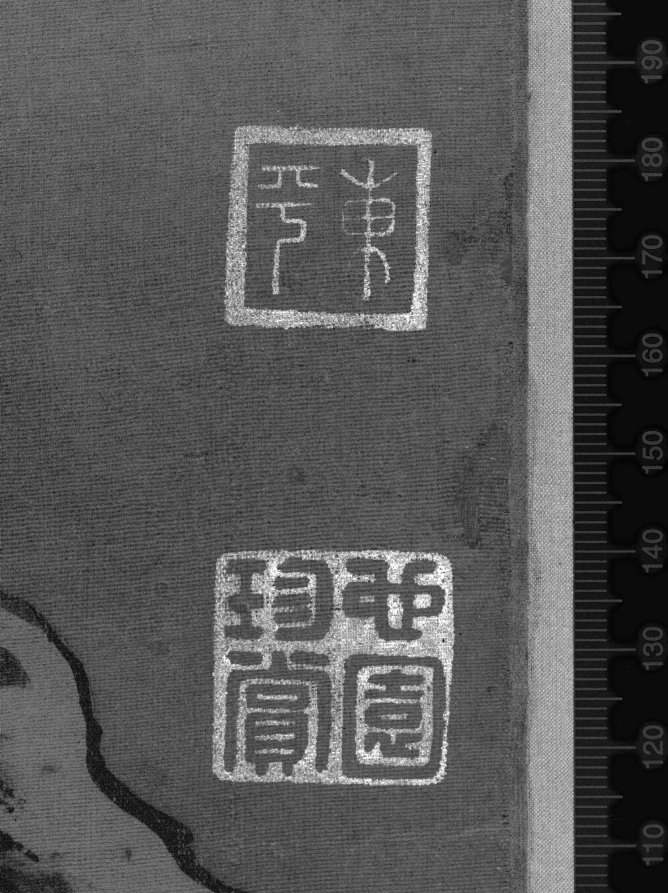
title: Birds in a Grove in a Mountainous Winter Landscape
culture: China, Jin dynasty (1115-1234)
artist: possibly by Gao Tao (Chinese, 1100s)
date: 1100s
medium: hanging scroll; ink and slight color on silk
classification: Painting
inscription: A signature and a seal at lower left edge: Gao Tao 高燾; seal undecipherable. 10 additional seals: 1 of Zhu Gang 朱棡 [1358–1398]; 3 of Suo’etu 索額圖 [1636–1703]; 2 of A’erxipu 阿爾喜普 [1700s]; 1 of Weng Fanggang 翁方綱 [1733–1818]; 3 unidentified.